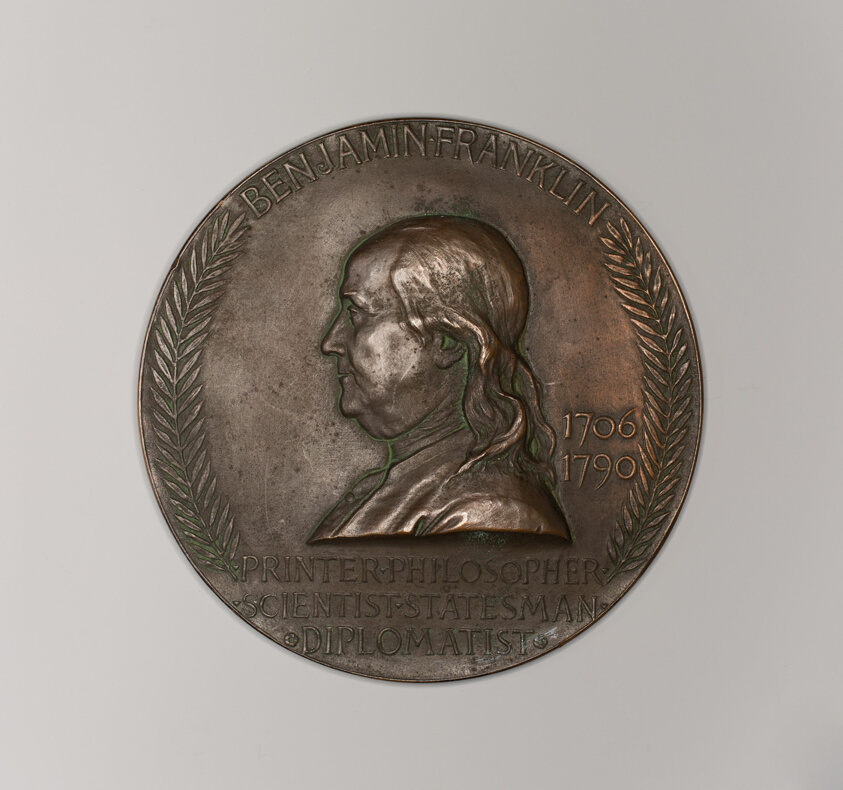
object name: Metalwork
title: Benjamin Franklin Commemorative Medal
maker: Louis Saint-Gaudens (American, 1854–1913)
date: 1906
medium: Bronze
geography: United States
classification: medal; american arts; decorative arts